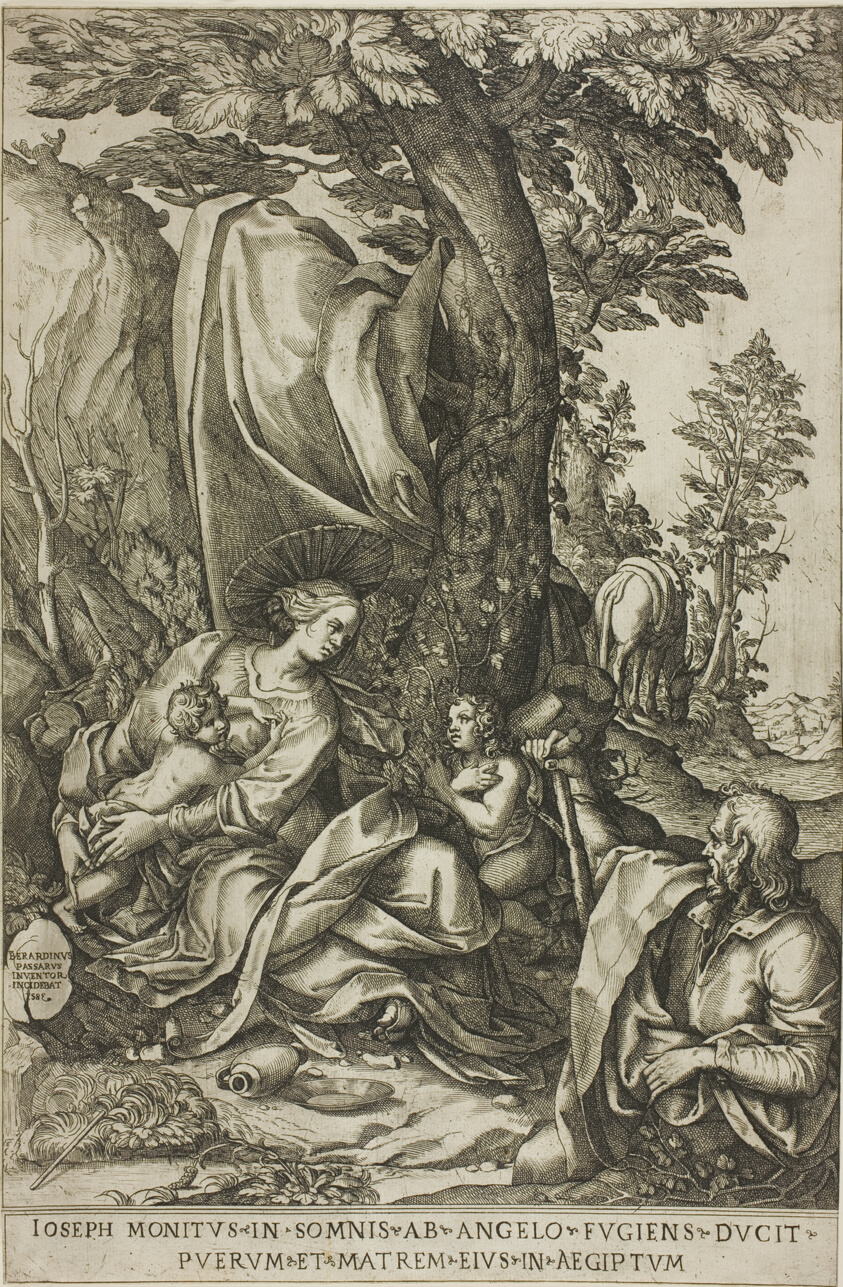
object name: Print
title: Rest on the Flight into Egypt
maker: Bernardino Passeri (Italian, c.1540-1591)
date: 1583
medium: Engraving in black on paper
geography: Italy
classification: engraving; print; prints and drawing